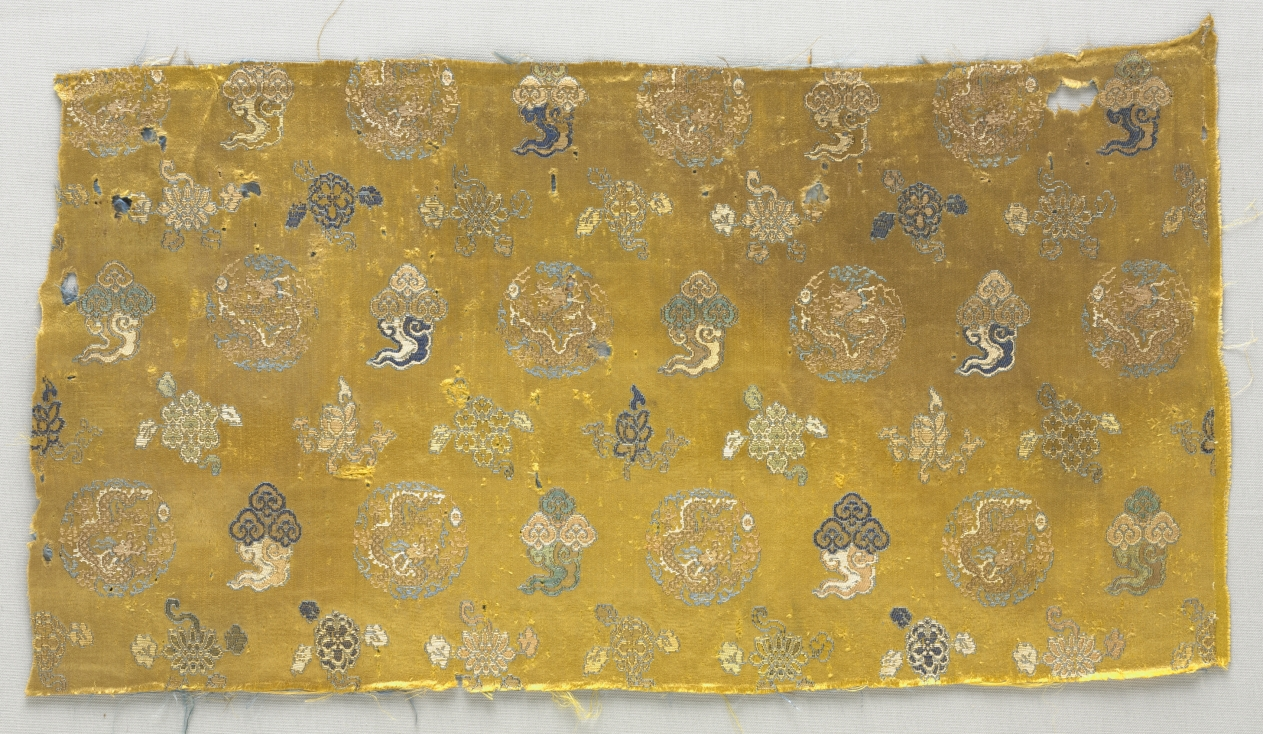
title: Fragment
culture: China, 18th century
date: 1700s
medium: brocaded satin; silk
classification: Textile